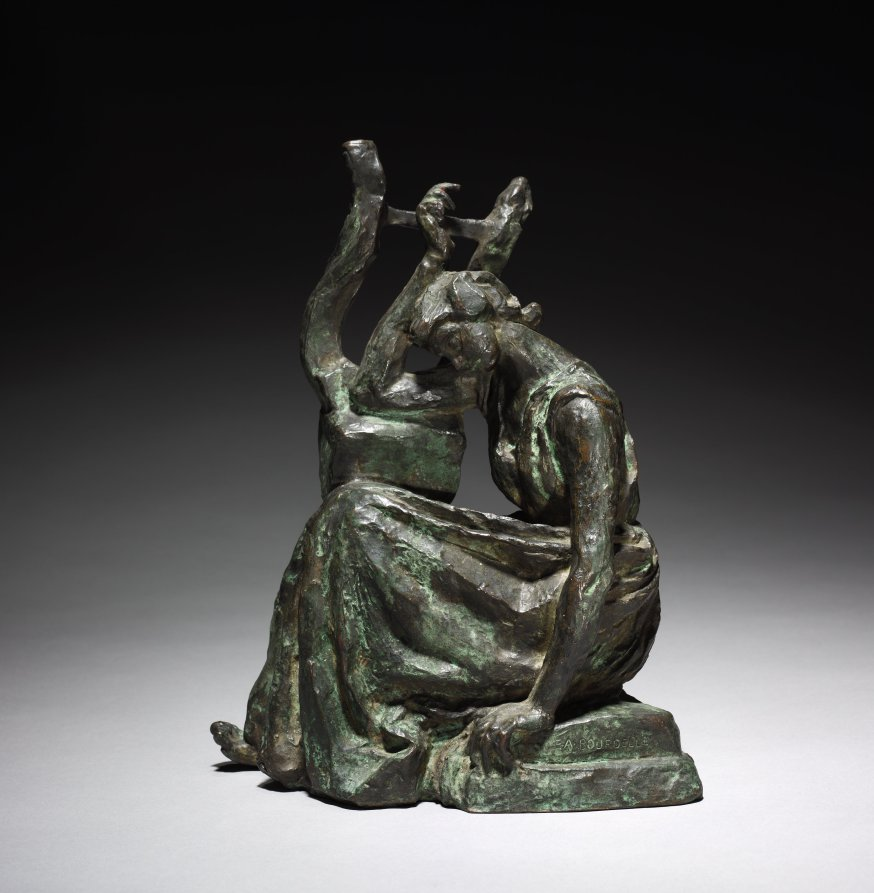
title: Sappho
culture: France, 19th century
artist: Emile Antoine Bourdelle (French, 1861–1929)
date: 1887–1925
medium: bronze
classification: Sculpture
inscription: Inscribed on back: "Alexis Rudier, Fondeur, Paris"; on right side: "E. A. Bourdelle"